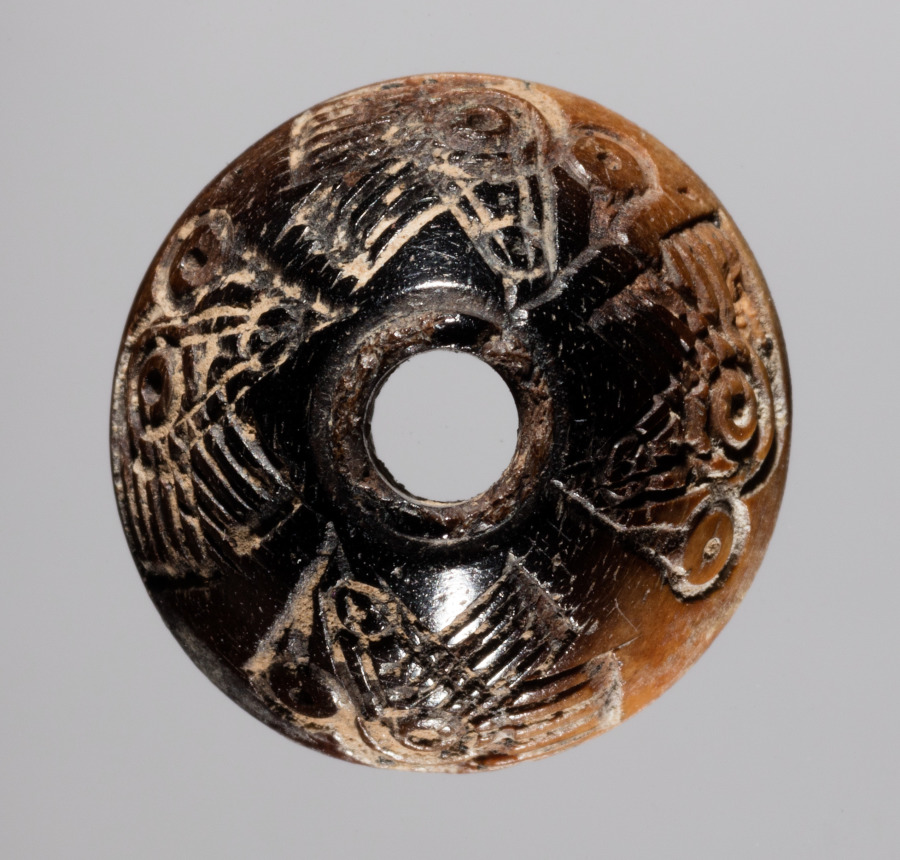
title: Spindle Whorl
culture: Iran, early Islamic period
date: 700s - 900s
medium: bone, incised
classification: Spindle Whorl